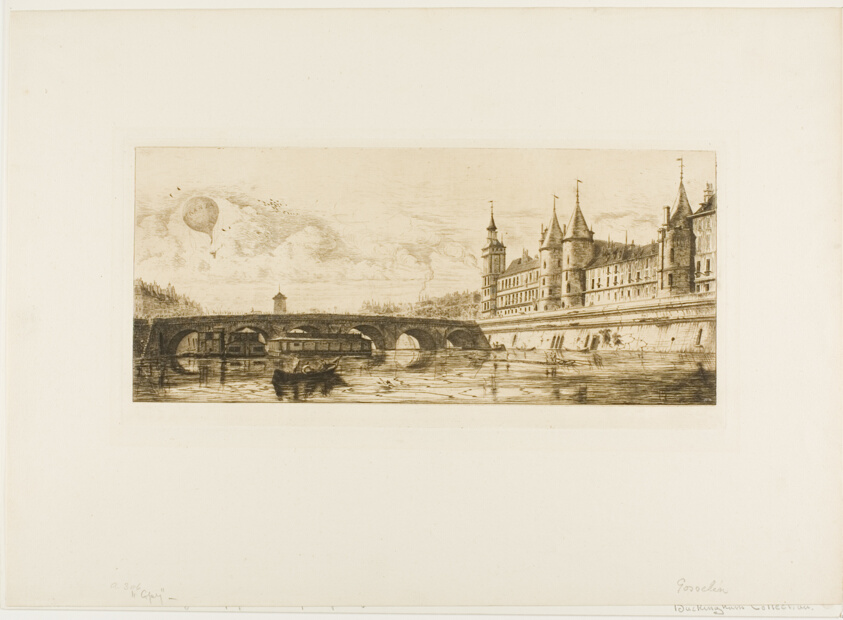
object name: Print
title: Pont-au-Change, Paris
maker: Edmond Gosselin (French, 19th century); after Charles Meryon (French, 1821-1868)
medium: Etching in brown on ivory laid paper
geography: France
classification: etching; print; prints and drawing